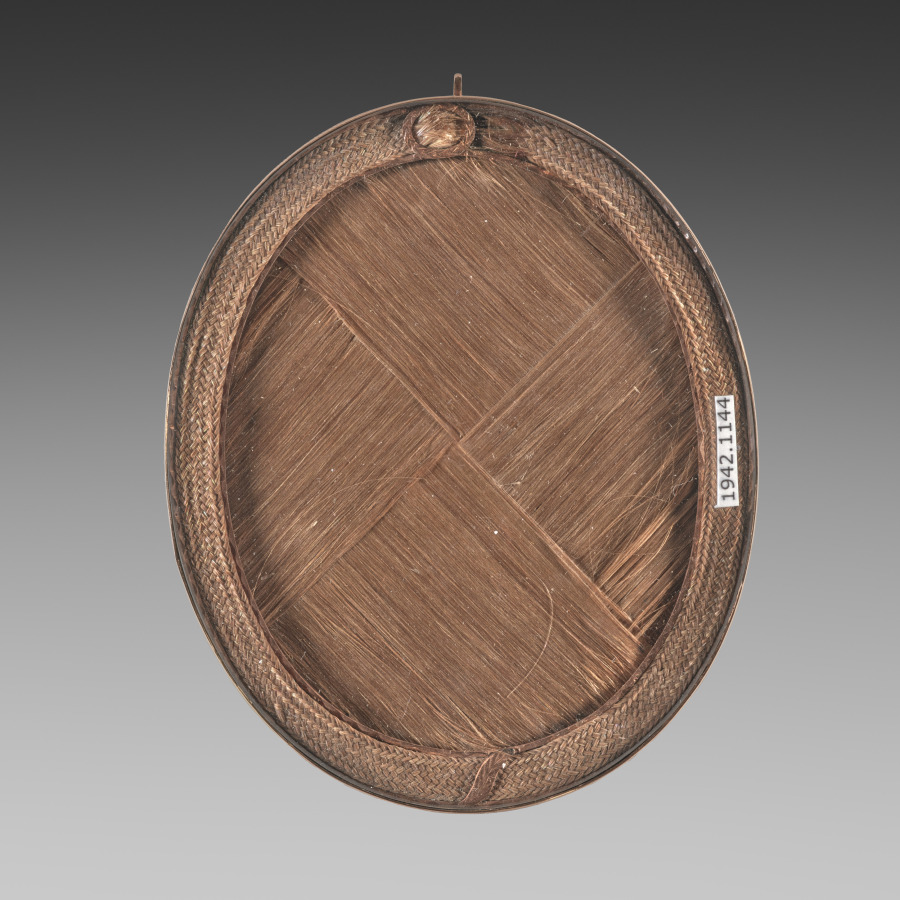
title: Portrait of Lady Grace Anna Newenham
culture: England, 18th century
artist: Horace Hone (British, 1756–1825)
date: 1784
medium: watercolor on ivory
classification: Portrait Miniature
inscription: Signed right: HH / 1784 [HH in monogram; inscribed on frame: "THOUGH LOST TO SIGHT TO MEMORY EVER DEAR. I.W. 28th NOVr 1821."]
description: Lady Grace Anna Newenham (née Burton, 1725–1807) was the wife of Sir Edward Newenham (1734–1814), a prominent radical Protestant Irish politician and MP for Dublin, whom she married in 1754 at St. Thomas in Dublin. Lady Newenham herself came from a highly influential family with deep Whig political roots in Dublin. This miniature was painted in 1784, when she was nearly 60 years old and had been married for 30 years. This period found her husband, Edward, deeply in debt, going to great lengths to secure employment for his children, and planning a trip to America. While the former conditions would not encourage an artistic expenditure, the latter might have provided the impetus for this portrait to be commissioned. Lady Newenham wears a gray wrap with a high white collar and a white low-neck dress. Her costume is summarily painted with quick strokes, and the ivory ground is allowed to show through particularly at her breast, enhancing the delicacy of her complexion. She is not, however, overly flattered as she would have been in the hands of a miniature painter like Richard Cosway (1742–1821). Instead, Horace Hone gently described her sagging jaw line as well as the wrinkles and moles on her face. She has the eyes of an older woman, beneath which Hone’s trademark glowing pink cheeks seem almost to suggest cosmetics. The texture of her lightly powdered brown hair that falls to her shoulders is delineated by Hone’s technique of scraping the surface of the watercolor paint with extremely fine lines that reflect light and suggest individual strands of hair. The background is a muddy gray sky with a hint of pale blue. Among the 18 children that Lady Newenham gave birth to over the course of two decades, six died at a young age. Lady Newenham wears a miniature on her breast, possibly depicting one of the children she lost. The back of the miniature contains plaited hair under glass, bordered with an elaborate woven hair “belt,” a typically Irish form of hairwork.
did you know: Human hair was frequently incorporated into miniatures and was especially appropriate for mourning miniatures because it transformed the object into a kind of reliquary.